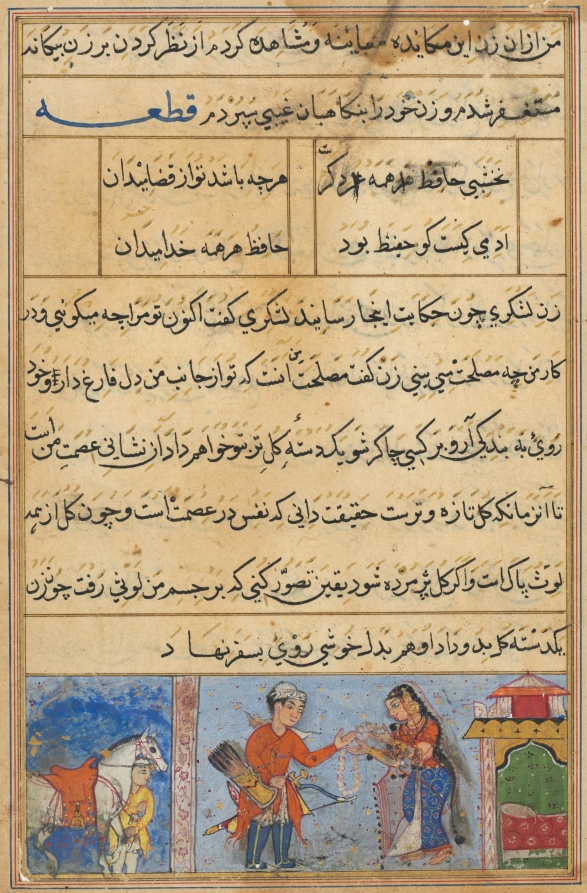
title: The soldier receives a garland of roses from his wife which will remain fresh as long as she is faithful, from a Tuti-nama (Tales of a Parrot): Fourth Night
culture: Mughal India, court of Akbar (reigned 1556–1605)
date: c. 1560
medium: gum tempera, ink, and gold on paper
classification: Painting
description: Upon his departure, a warrior’s wife gives him roses that stay fresh as long as she remains faithful in his absence. This story reveals a connection between virtue and nature: the flowers remain fresh because of her loyalty. The stories in the Tuti-nama reveal the interconnectedness of Indian, Persian, and Central Asian populations. The Persian retellings of Sanskrit tales found in this manuscript were completed in 1330 by the learned Central Asian Sufi author Ziya’ al-din Nakshabi working in Delhi, the capital of India. Indian and Persian artists worked together to illustrate this copy for the Mughal emperor Akbar.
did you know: This work is attributed to the same unnamed artist who painted folio 45r (CMA 1962.279.45.a).